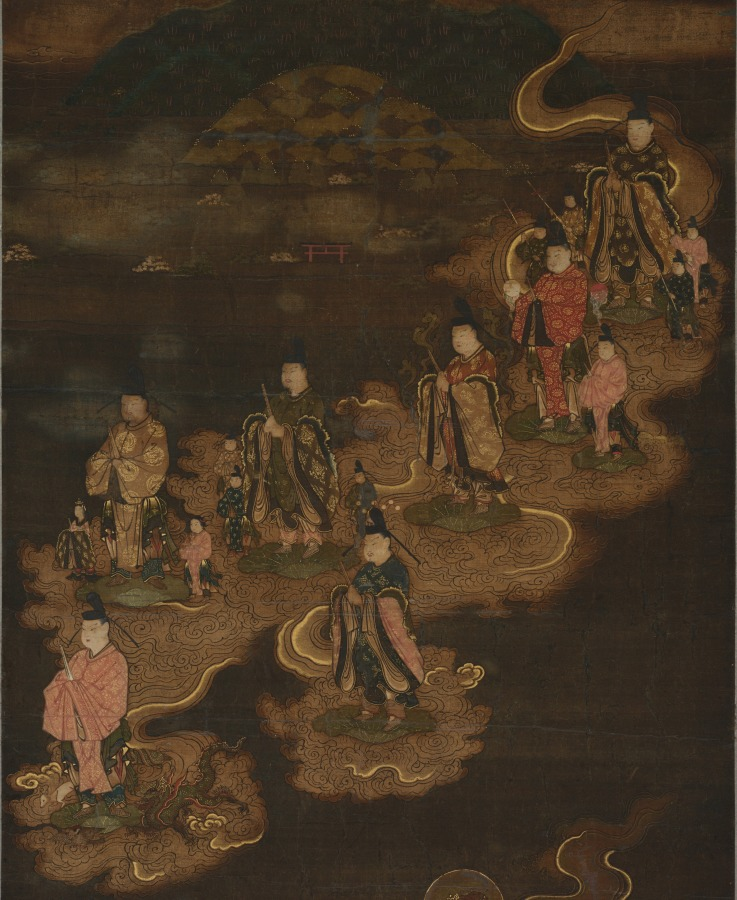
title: Descent of the Nine Luminaries and the Seven Stars at Kasuga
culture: Japan, Nanbokuchō period (1336–92)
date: mid- to late 1300s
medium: Hanging scroll; ink, color, gold and cut gold on silk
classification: Painting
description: This medieval religious painting shows celestial beings descending from the heavens into the Kasuga Shrine, a major religious site in Japan's ancient capital, Nara. The moon and the Kasuga mountain range appear in the uppermost portion of the painting, as does a red shrine entrance gate, or torii. In the upper part of the painting, figural representations of the stars in the constellation known as the Big Dipper in the West descend from right to left on cloud banks. In the lower part, the Nine Luminaries (Sanskrit: Navagraha) that emerged from the Vedic tradition—the sun and moon; the planets Jupiter, Mars, Saturn, Venus, and Mercury; and personifications of the fluctuating lunar nodes—descend in similar fashion. The painting uses the "deities in descent" scheme originating in China, as well as the original Buddhist form mandala (Japanese: honjibutsu mandarazu) format prevalent in medieval Japanese Shinto-Buddhist painting, to generate an image connected to the worship of celestial bodies in Esoteric Buddhism.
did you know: A 19th-century copy of this painting in ink and light color exists at the Kyoto City University of Arts.